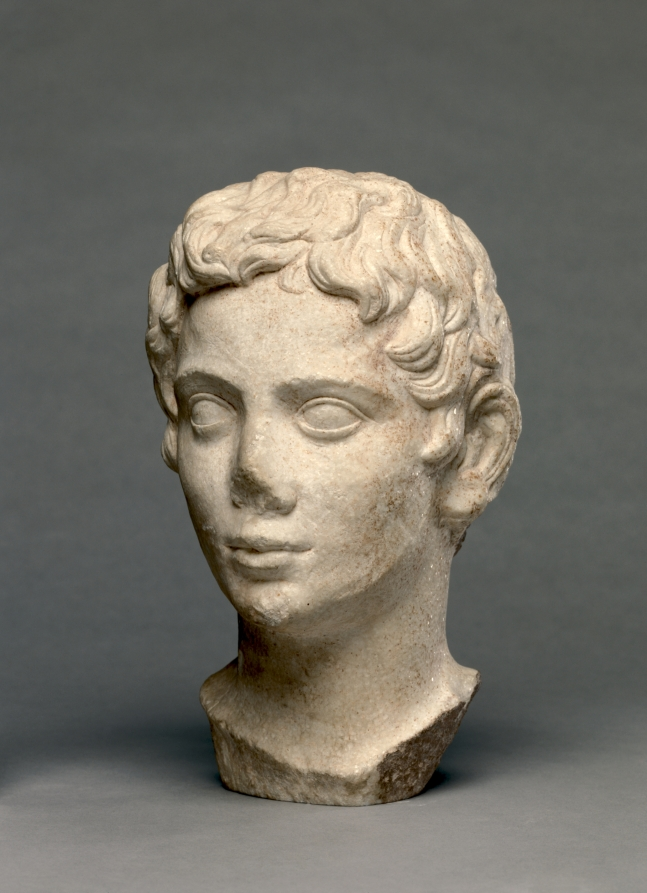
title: Portrait Head of a Youth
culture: Egypt, Alexandria, Roman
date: 1–100 CE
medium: marble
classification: Sculpture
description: Several unusual features of this head suggest that its carving was never finished in antiquity. These include unfinished hair around the ears, small bumps remaining in the hair near the front and top of the head, and the lack of a finely polished surface. Although said to have been found in Egypt, the head is carved of dolomitic marble thought to come from the Saliari region of the northern Greek island of Thasos.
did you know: The carving of this head was never finished.